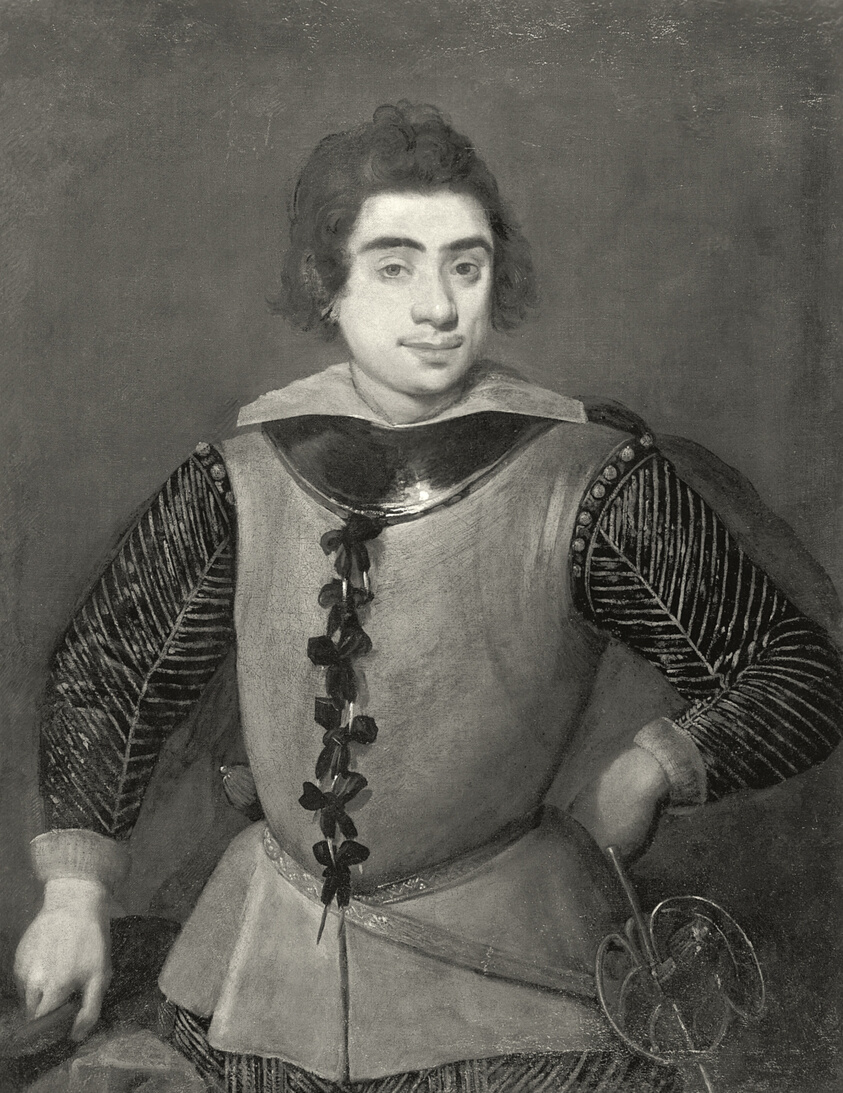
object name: Painting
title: Man in Armour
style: 17th Century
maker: Antonio Puga (Spanish, 1602–1648)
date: 17th century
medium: Oil on canvas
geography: Spain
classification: painting; spanish; portrait; paint; oil paintings (visual works); oil on canvas; european painting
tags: portraits: male subject, portrait, portraits, man, armor, swords, wealth